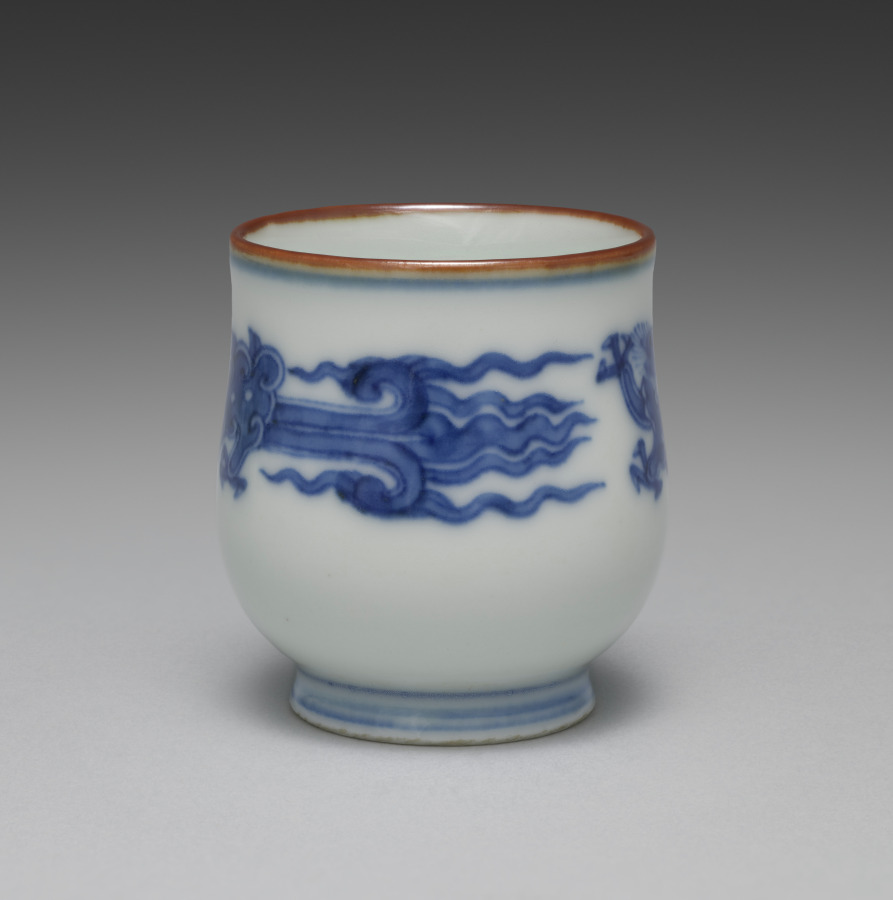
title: Cup from Sake Cups with Dragons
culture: Japan, Meiji period (1868–1912)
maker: Seifū Yohei III (Japanese, 1851–1914)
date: c. 1893–1914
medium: One from a set of six sake cups; porcelain with underglaze blue and iron oxide rims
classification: Ceramic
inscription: 大日本清風造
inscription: 清風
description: Each of these sake cups pictures two backward-looking dragons. The highly stylized creatures resemble jade carvings.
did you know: Seifū Yohei III was inspired by the Chinese mythical animals that were common on porcelain objects made at Jingdezhen in China during the Ming dynasty (1368–1644) and then exported around the world.